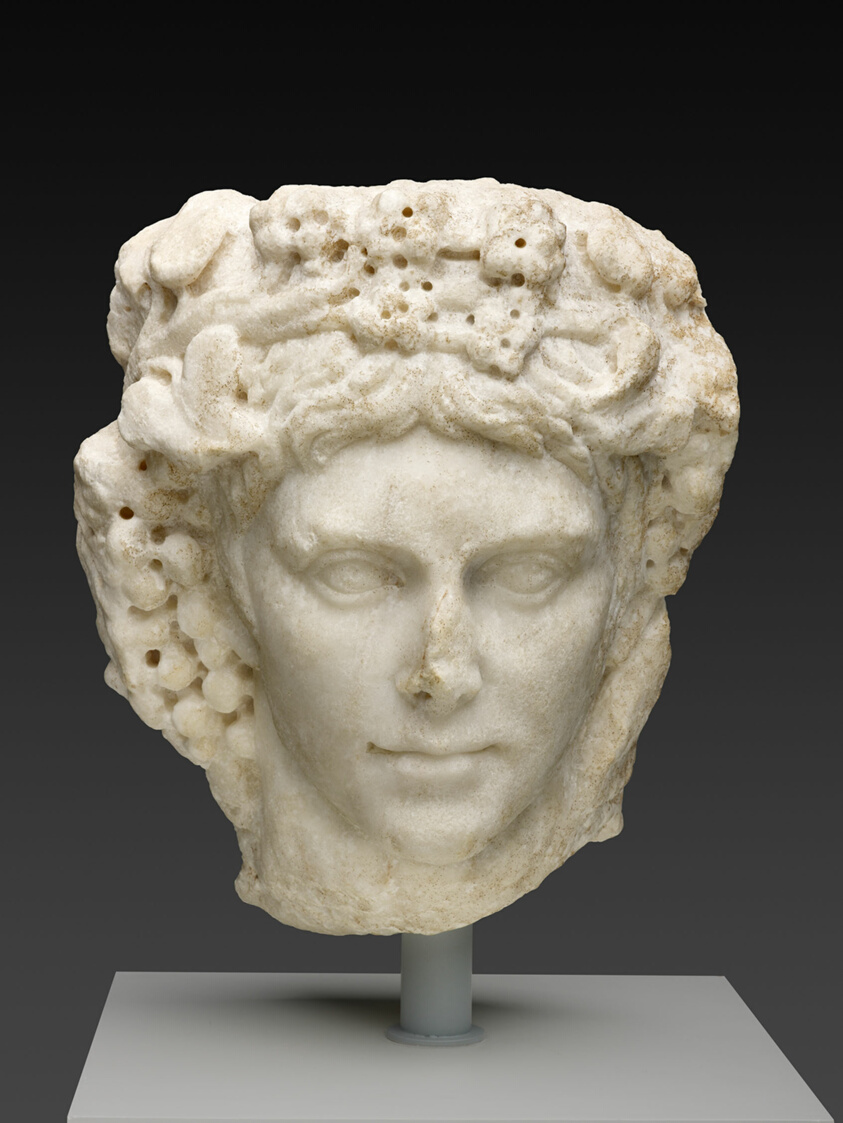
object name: Sculpture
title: Portrait Head of a Man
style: roman (ancient, style or period), ancient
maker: Roman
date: Mid–3rd century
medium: Marble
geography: Italy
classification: marble; stone; sculpture; ancient art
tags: portraits